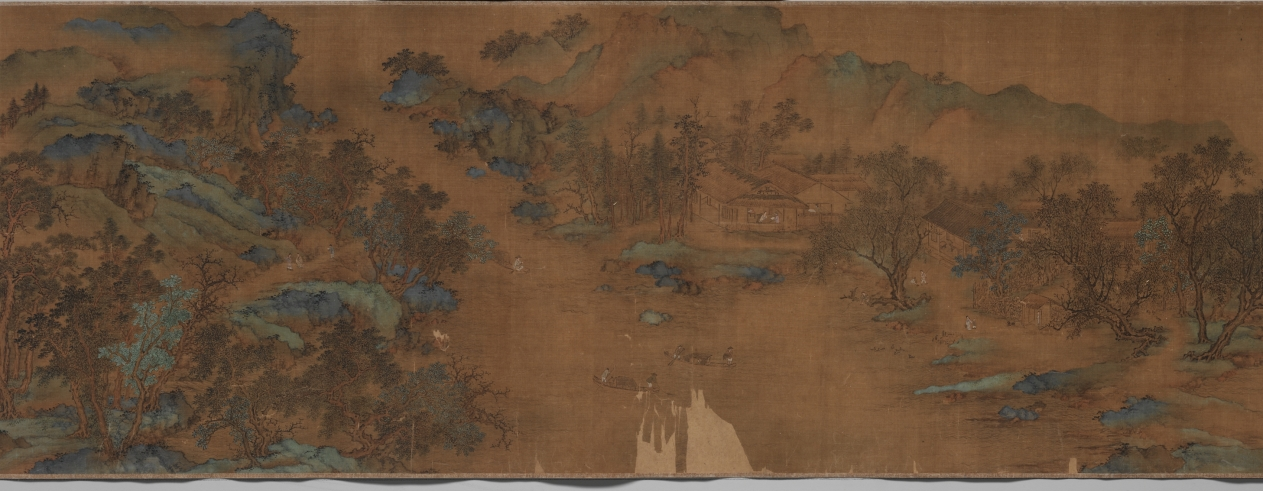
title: Landscape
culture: China, Ming dynasty (1368–1644)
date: 1368– 1644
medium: handscroll; ink and slight color on silk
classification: Painting